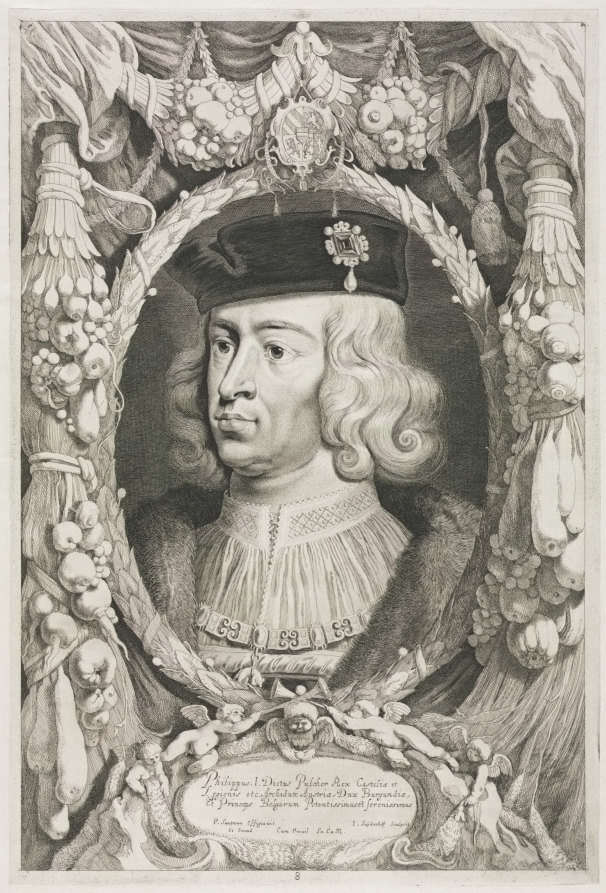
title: The Dukes of Burgundy: No. 8. Portrait of Philippe I (the Handsome) of Castile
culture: Netherlands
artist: Jonas Suyderhoef (Dutch, c. 1613–1686)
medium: engraving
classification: Print